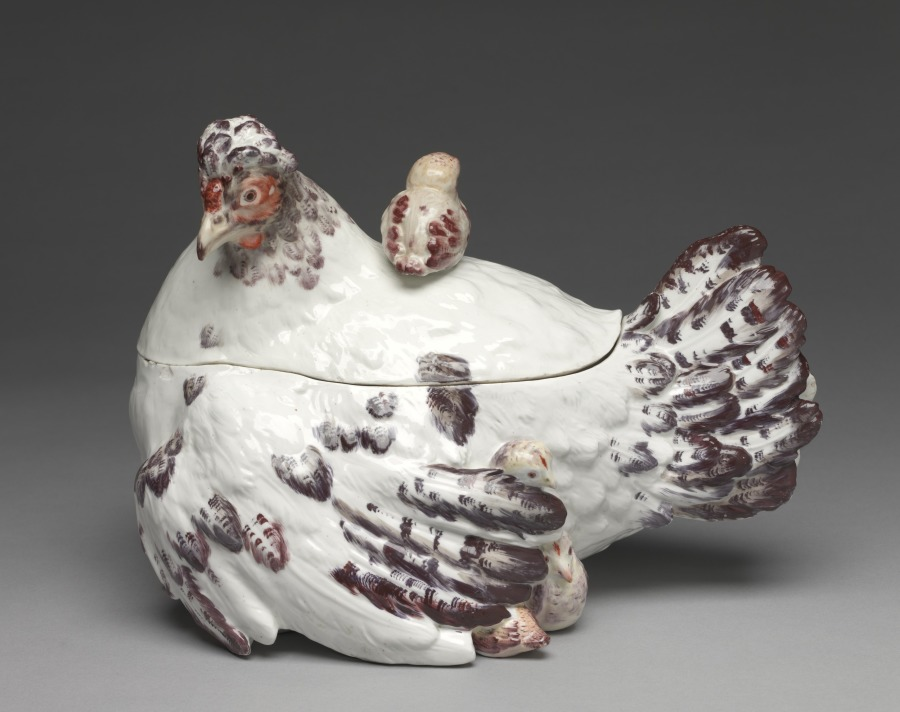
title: Hen and Chicks Covered Tureen on Stand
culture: England, London, Chelsea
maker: Chelsea Porcelain Factory (Britain, London, 1745–84)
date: c. 1755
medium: soft-paste porcelain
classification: Ceramic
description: The ceramic factory at Chelsea, located along the river Thames in western London, was Britain’s most renowned factory of decorative porcelain in the mid-1700s. Large tureens in the form of chickens or rabbits appealed to wealthy aristocrats, who took great care in developing specimen animal and poultry breeds on their country estates. The design for this particular tureen was taken from a popular seventeenth-century print by Francis Barlow depicting a farmyard.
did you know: Though the form of a soup tureen suggests a functional role at the dining table, such large, expensive porcelains were probably only used for decoration because hot liquids might have easily caused them to crack.